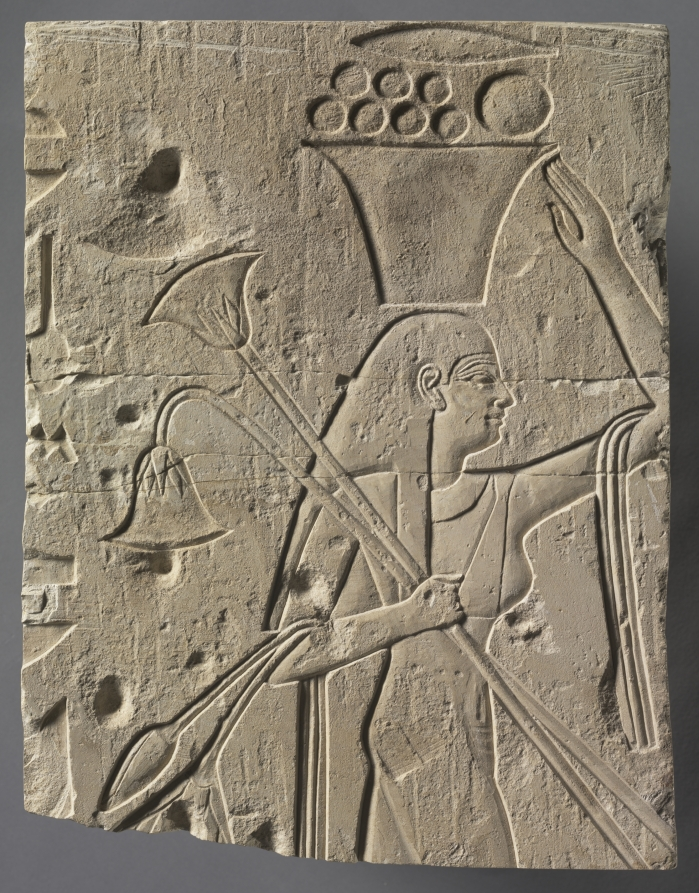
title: Female Offering Bearer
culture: Egypt, Thebes, Late period (715–332 BCE), Dynasty 26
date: c. 667–647 BCE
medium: limestone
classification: Sculpture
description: A servant girl brings tomb offerings to the tomb owner. She carries long stalks of papyri with lotus flosers and buds slung over her arms. The basket balanced on her head contains either fruit or cakes. To the left is an incomplete offering formula. Based on Old Kingdom work.